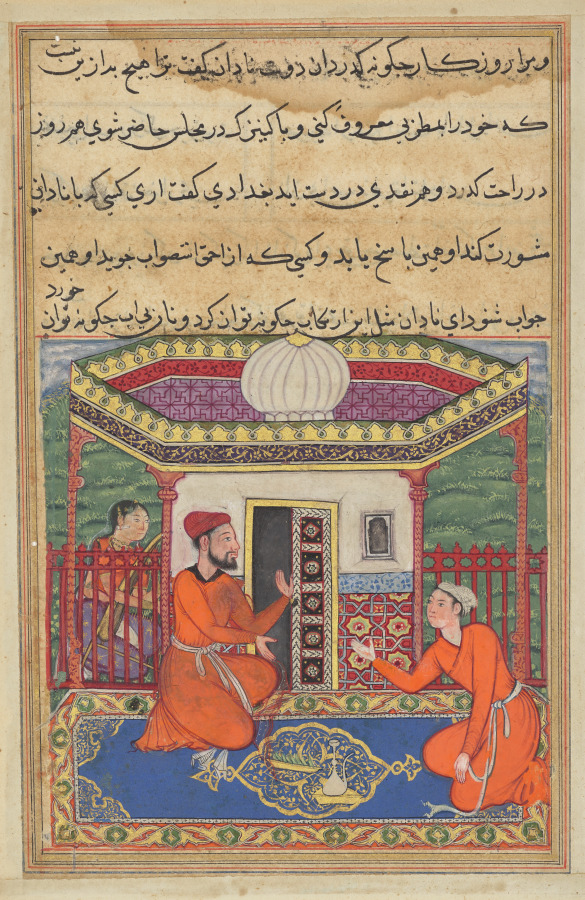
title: The young man of Baghdad solicits advice from a friend as his slave girl, who is adept at music, awaits, from a Tuti-nama (Tales of a Parrot): Forty-eighth Night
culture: Mughal India, court of Akbar (reigned 1556–1605)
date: c. 1560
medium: gum tempera, ink, and gold on paper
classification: Painting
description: The young man, on the right, shares his problem with his friend. His lover, the slave girl, waits in the background, harp in hand. The man has squandered his riches and now seeks a way to earn them back. His friend suggests that he should become a musician and entertain nobility. Finding this advice degrading, the young man declines and decides to sell the girl.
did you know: The girl’s left eye extends beyond the contours of her face, and she wears an ivory plug earring; both are common features of pre-Mughal painting.